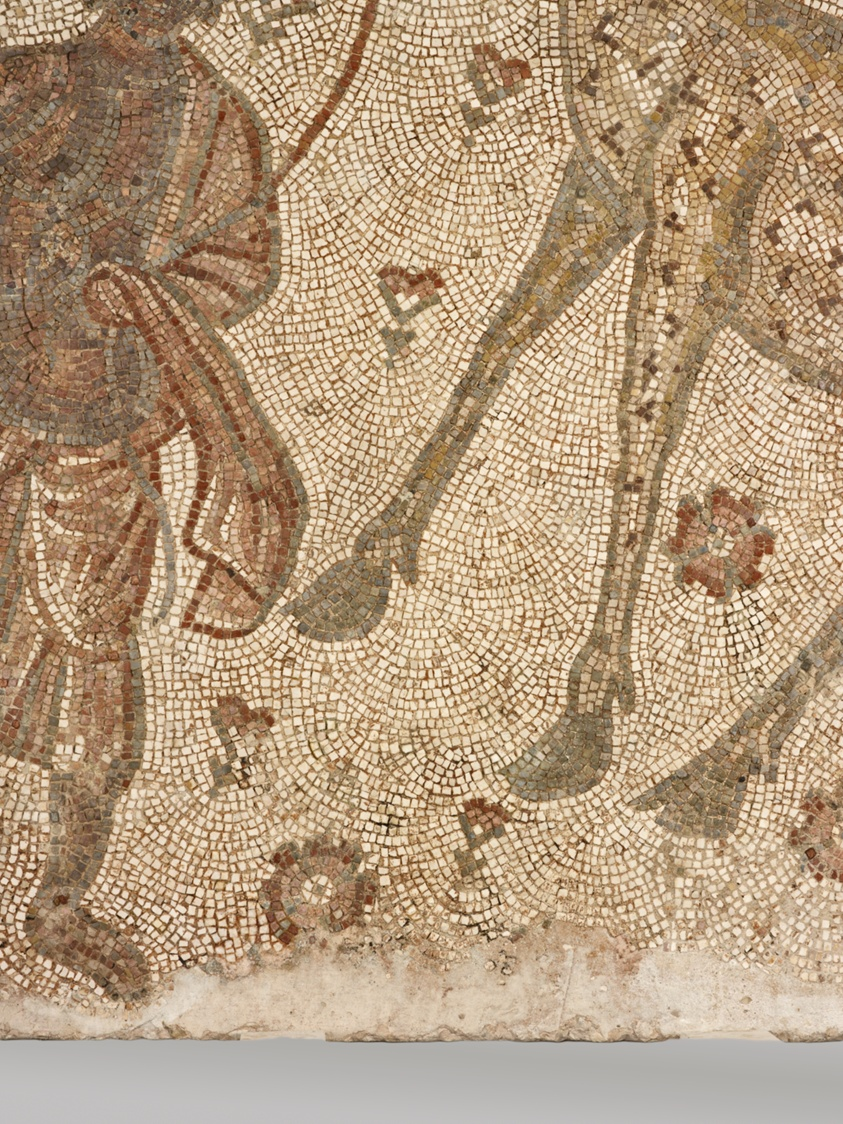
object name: Architectural fragment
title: Mosaic Fragment with Man Leading a Giraffe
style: byzantine, ancient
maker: Byzantine; Syria or Lebanon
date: 5th century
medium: Stone in mortar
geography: Tyre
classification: architectural fragment; mosaic; ancient art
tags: animals, men